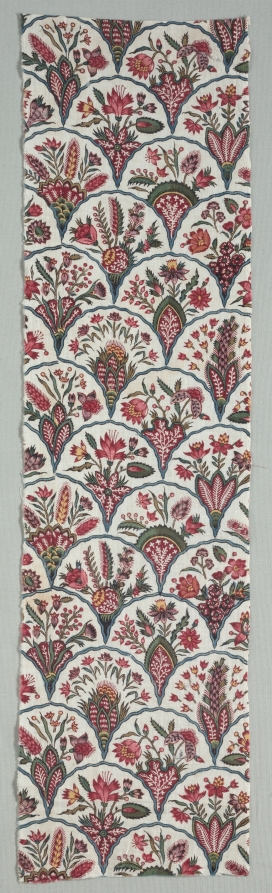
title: Fragment of Woodblock Printed Cotton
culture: France, Marseilles ?, 18th century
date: c. 1775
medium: woodblock print on cotton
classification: Textile